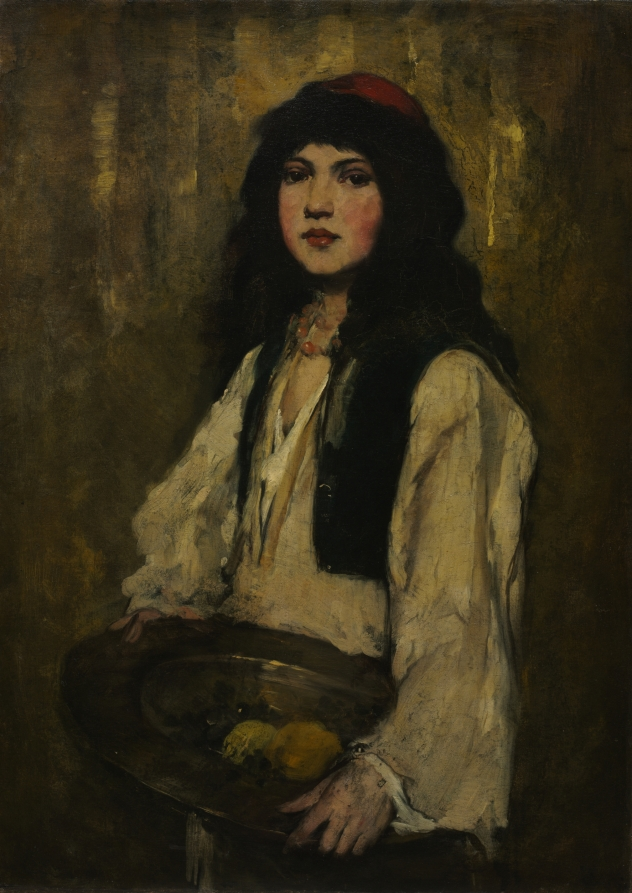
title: The Venetian Girl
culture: America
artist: Frank Duveneck (American, 1848–1919)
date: c. 1880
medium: oil on canvas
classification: Painting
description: Frank Duveneck loved Venice and spent several months there during the early decades of his career. Titled The Venetian Girl, this painting depicts a young woman—likely an artist’s model—who holds a shallow brass bowl containing lemons and grapes.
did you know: The artist was also an esteemed art instructor, teaching hundreds of students in Germany, Italy, and the United States.